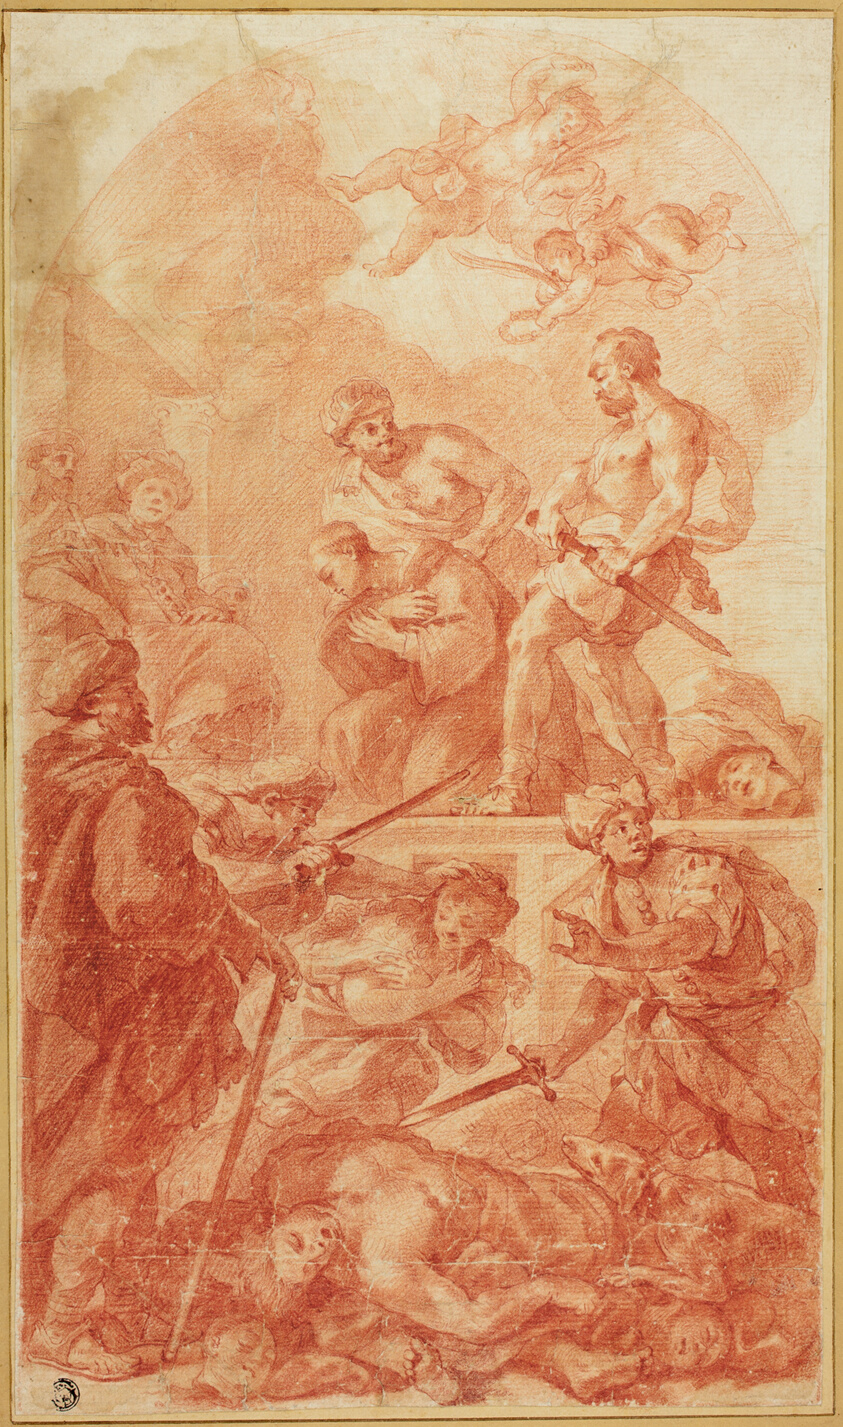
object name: Drawing and Watercolor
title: Martyrdom Scene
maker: Antonio Molinari (Italian, 1665-1727); or after Luca Giordano (Italian, 1632-1705)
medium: Red chalk, on ivory laid paper, laid down on card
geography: Italy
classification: chalk; drawings (visual works); prints and drawing